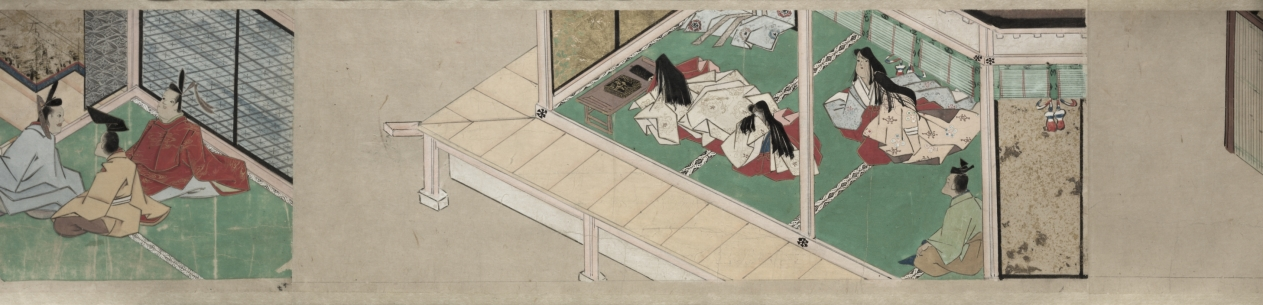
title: The Saltmaker's Story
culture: Japan, Edo period (1615–1868)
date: early 1600s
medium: One of a pair of handscrolls; ink, color, and gold on paper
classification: Painting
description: Once read and copied by girls at New Year’s celebrations and included in dowries, The Saltmaker’s Story is a rags-to-riches tale in which daughters are gifts from the gods. Despite his simple outlook, the main character progresses from humble roots as an associate at Kashima Shrine to the elite status of grandfather of the emperor through the intervention of the Kashima deity. The Saltmaker’s Story is traditionally presented in a set of three scrolls, but the text of this set has been removed by a previous owner, who remounted the illustrations as a pair. The paintings of this one take us from right to left through the first half of the tale.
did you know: This handscroll originally had texts before its paintings, but the texts were removed.